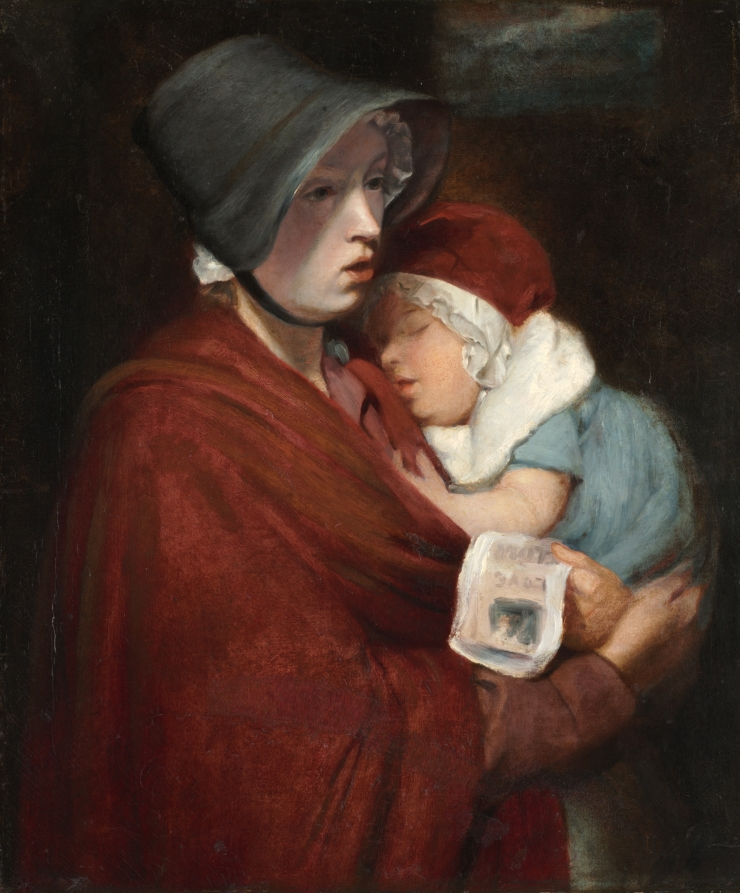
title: Street Singer and Child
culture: England, 18th century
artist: John Opie (British, 1761–1807)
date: 1700s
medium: oil on canvas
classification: Painting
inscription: Inscribed across book: "LOVE/CLOWN (N or R).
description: John Opie's working-class roots made him sympathetic to the plight of the laborer. This painting demonstrates his interest in an honest portrayal of British street life, a sympathy rarely seen in the work of other British artists of his generation, who often presented lower classes more coldly. Much of Britain's population at this time was poor, but beggars and street vendors had a particularly low status. Street singers were often sellers of goods. By focusing the composition tightly on the woman and not including any wares, Opie makes the viewer recognize her humanity; moreover, he emphasizes the connection between mother and child. The singer is working to feed her baby, evoking sympathy from the viewer.